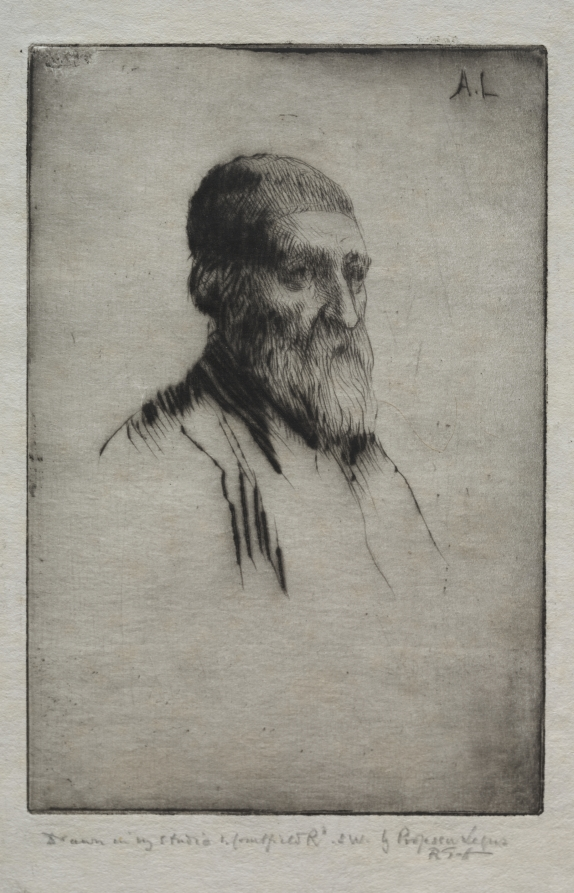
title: Head of a Man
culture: France, 19th century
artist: Alphonse Legros (French, 1837–1911)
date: c. 1857–1911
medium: drypoint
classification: Print